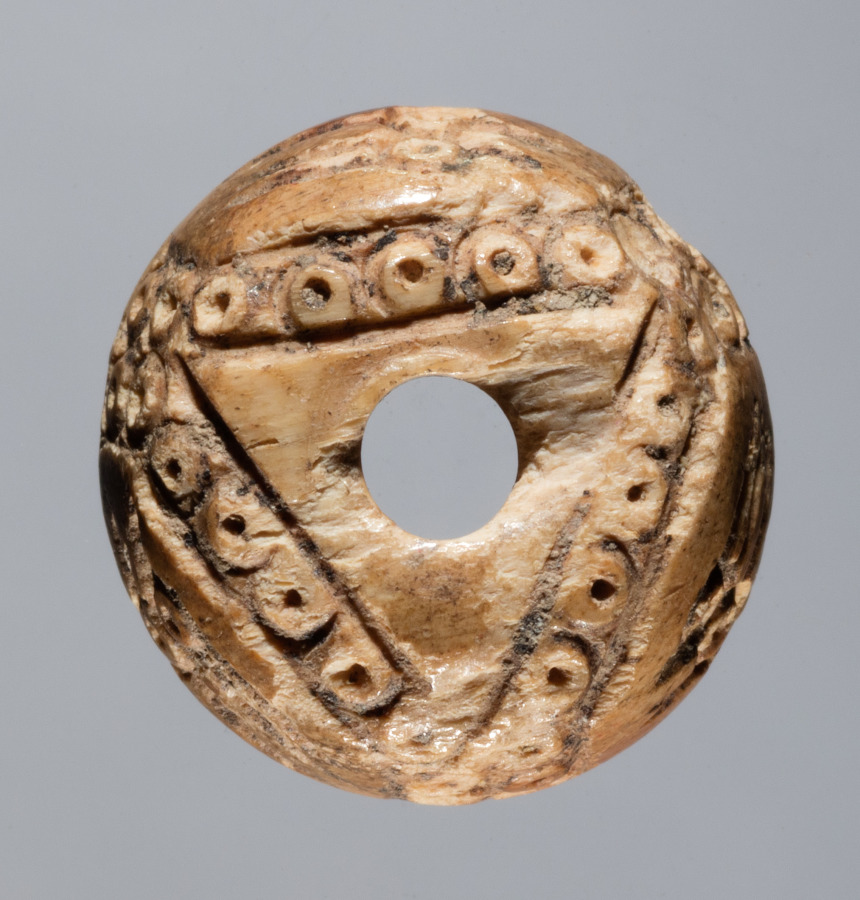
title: Spindle Whorl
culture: Iran, early Islamic period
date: 700s - 900s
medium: bone, incised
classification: Spindle Whorl